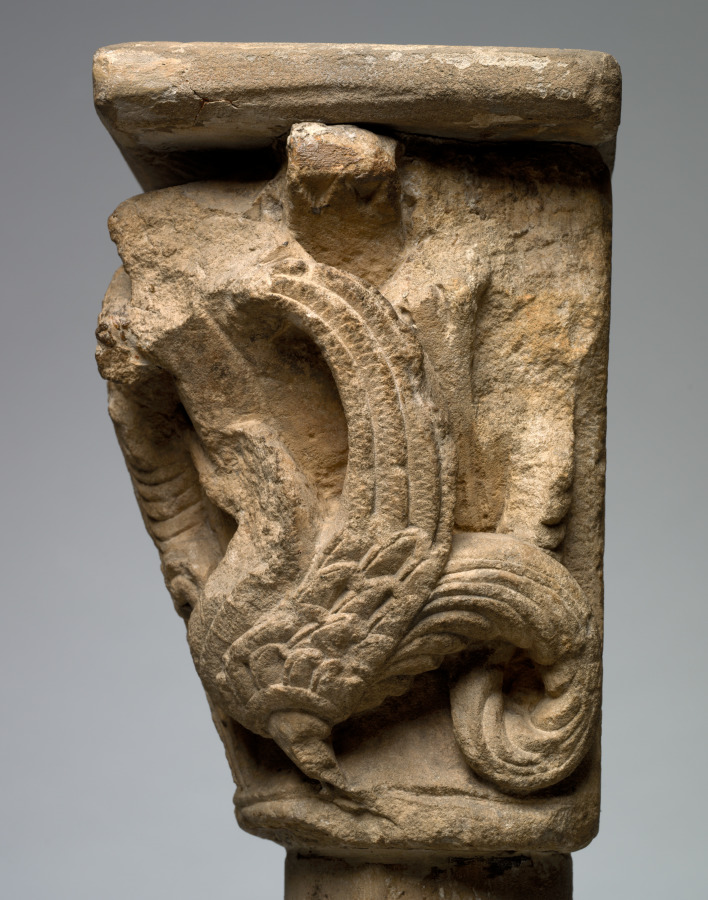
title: Engaged Capital with Birds and Dragons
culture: Western France, Bordelais or Dordogne, late 12th Century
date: late 1100s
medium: limestone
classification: Sculpture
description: Monstrous images were prevalent in the decoration of religious buildings during the Middle Ages. Such images must have impressed, perhaps even terrified, the monks and visitors who spent much of their time within the cloister or church, a place of prayer, contemplation, and reflection. Scholars have speculated how such images would have been received by the people given the ubiquity of monsters in medieval society. The carved monsters, often symbolizing vice and retribution for sin, were possibly designed to provoke a range of emotional responses including laughter, wonder, surprise, fear, and shock. This striking imagery must have had a strong impact, which in turn led Saint Bernard of Clairvaux (1090–1153), the spiritual head of the Cistercian order, to admonish their use as distracting from prayer.